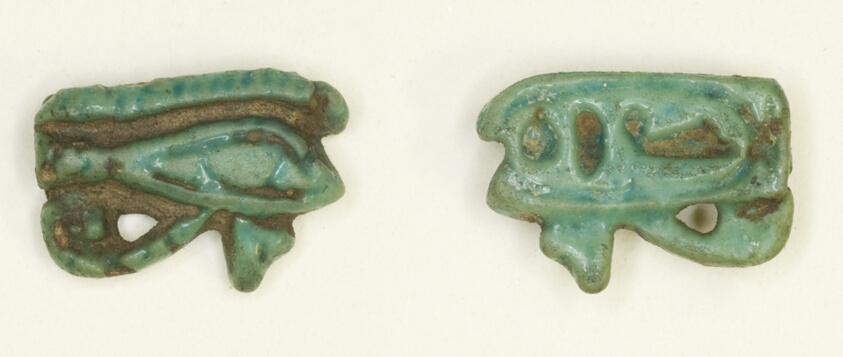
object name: Costume and Accessories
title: Eye of Horus (Wedjat) Amulet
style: new kingdom, eighteenth dynasty, ancient, egyptian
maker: Egyptian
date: New Kingdom, Dynasty 18, reign of Amenhotep III (about 1390–1352 BCE)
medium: Faience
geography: Egypt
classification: amulet; jewelry; ancient art; costume; faïence (composite material)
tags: eye of Horus, pharaohs, kings, king, Hieroglyphs, cartouches